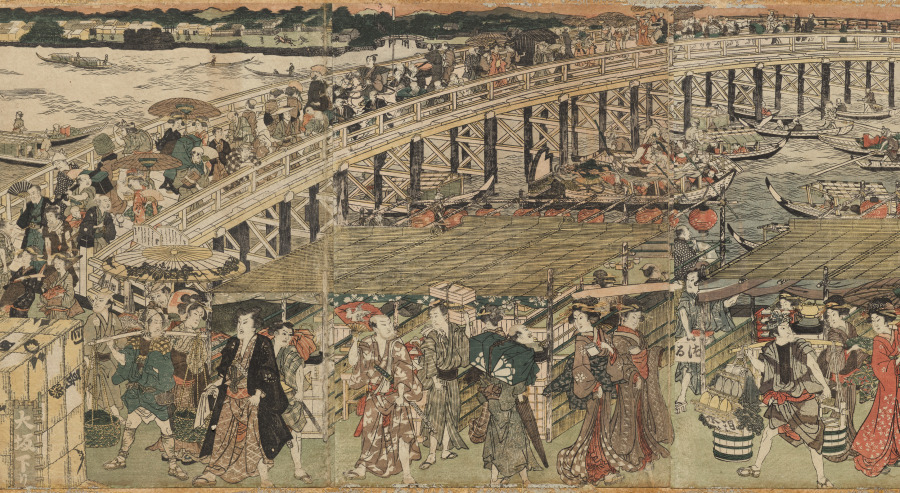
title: Cooling Off at Ryōgoku Bridge in Edo, a Pentaptych (Edo Ryôgoku suzumi no zu, gomai tsuzuki)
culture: Japan, Edo period (1615–1868)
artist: Utagawa Toyokuni (Japanese, 1769–1825)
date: 1811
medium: Pentaptych of color woodblock prints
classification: Print